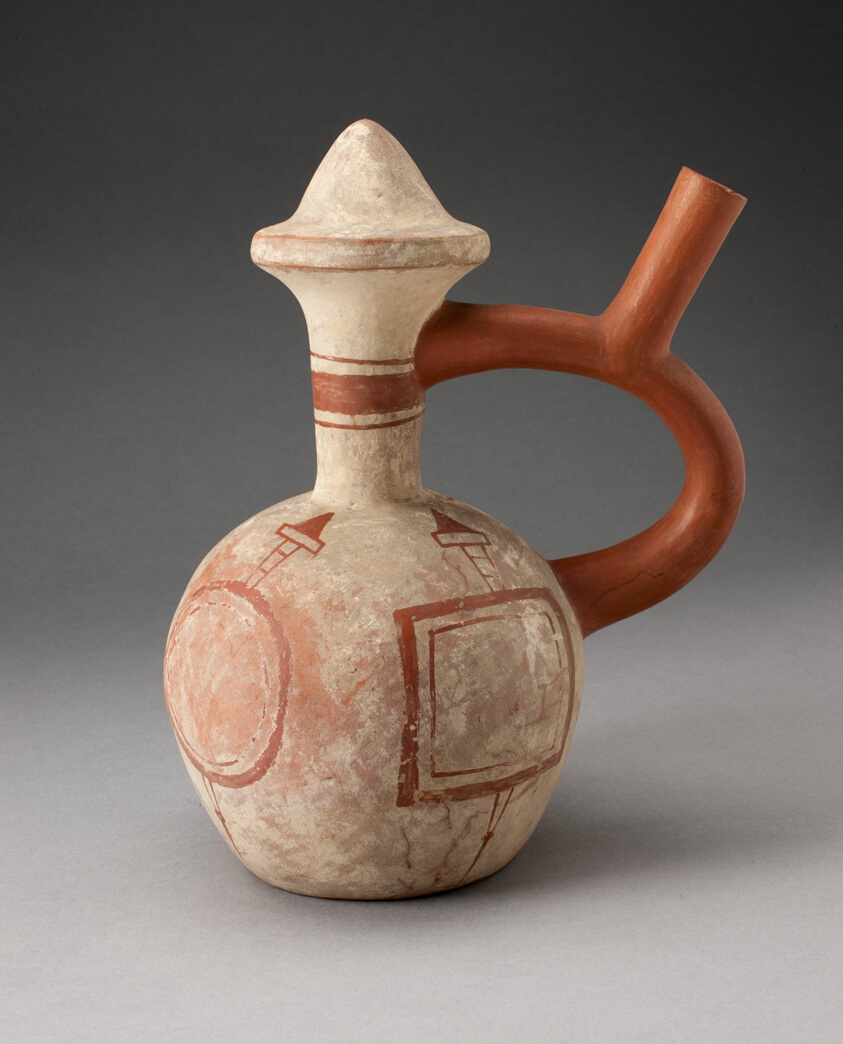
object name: Vessel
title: Handle Spout Vessel in the Form of a Mace with Fineline Mace and Shield Motifs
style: moche, Arts of the Americas, andes, south american, andean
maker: Moche (North coast, Peru)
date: 100 BCE–500 CE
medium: Ceramic and pigment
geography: Peruvian North Coast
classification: earthenware; ceramics; vessel; art of the americas